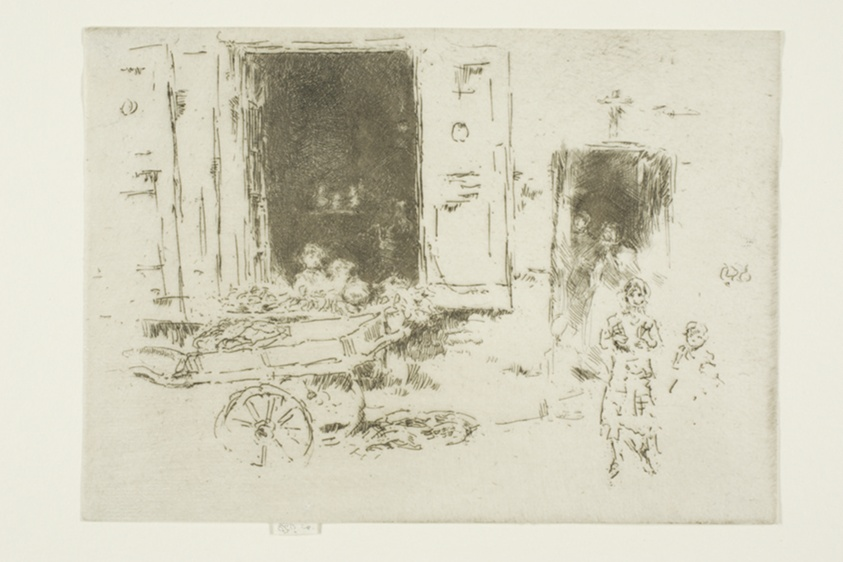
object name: Print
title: The Barrow - Quartier des Marolles, Brussels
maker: James McNeill Whistler (American, 1834-1903)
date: 1887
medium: Etching and drypoint with foul biting in black ink on ivory laid paper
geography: United States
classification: etching; foul biting; print; prints and drawing; drypoint; paper